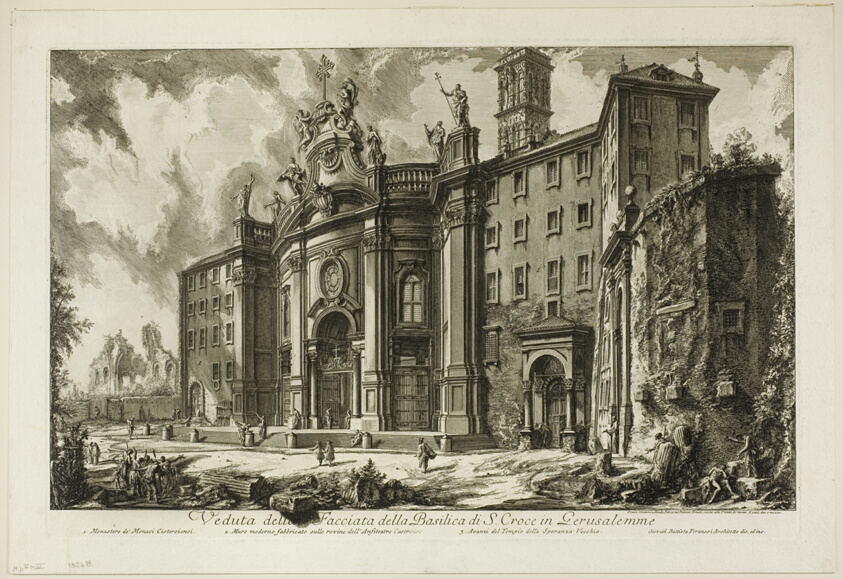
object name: Print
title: View of the Façade of the Basilica of S. Croce in Gerusalemme [the Holy Cross in Jerusalem], from Views of Rome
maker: Giovanni Battista Piranesi (Italian, 1720-1778)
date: 1750/59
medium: Etching on heavy ivory laid paper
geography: Italy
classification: etching; print; prints and drawing